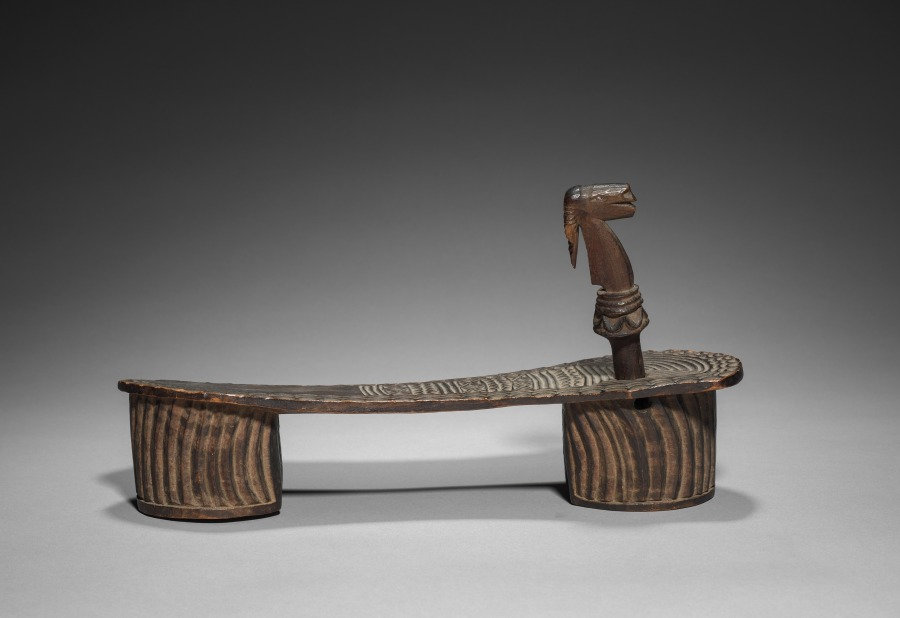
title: Sandal (mtalawanda / mtawanda) or Clog (kiatu cha mti)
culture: Africa, Central Africa, Democratic Republic of Congo, unidentified carver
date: c 1800s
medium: Wood and glass beads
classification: Wood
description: Common in the Indian Ocean region, wooden sandals changed meaning across place and time. This pair’s base elevates the foot as the toes grip an antelope-shaped peg (msuruaki). Crisp geometric sole designs suggest they were rarely worn. East African elites and merchants once had exclusive rights to wooden shoes, wearing elaborate ones only for portraits. Formerly enslaved people living along the coast wore simpler ones from the 1840s onward, adopting elite footwear to assert their liberation. However, slave traders like the Zanzibari “Tippu Tip” (c. 1832–1905) likely brought mitalawanda to Central Africa; stylistic elements of this pair hail from that region.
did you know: This distinctive footwear traveled from Southeast Asia and the Middle East to Africa, first to the Swahili Coast and then further inland to parts of Central Africa. The deity Krishna wears similar shoes (paduka) in an eighteenth-century Indian miniature painting (2003.344).